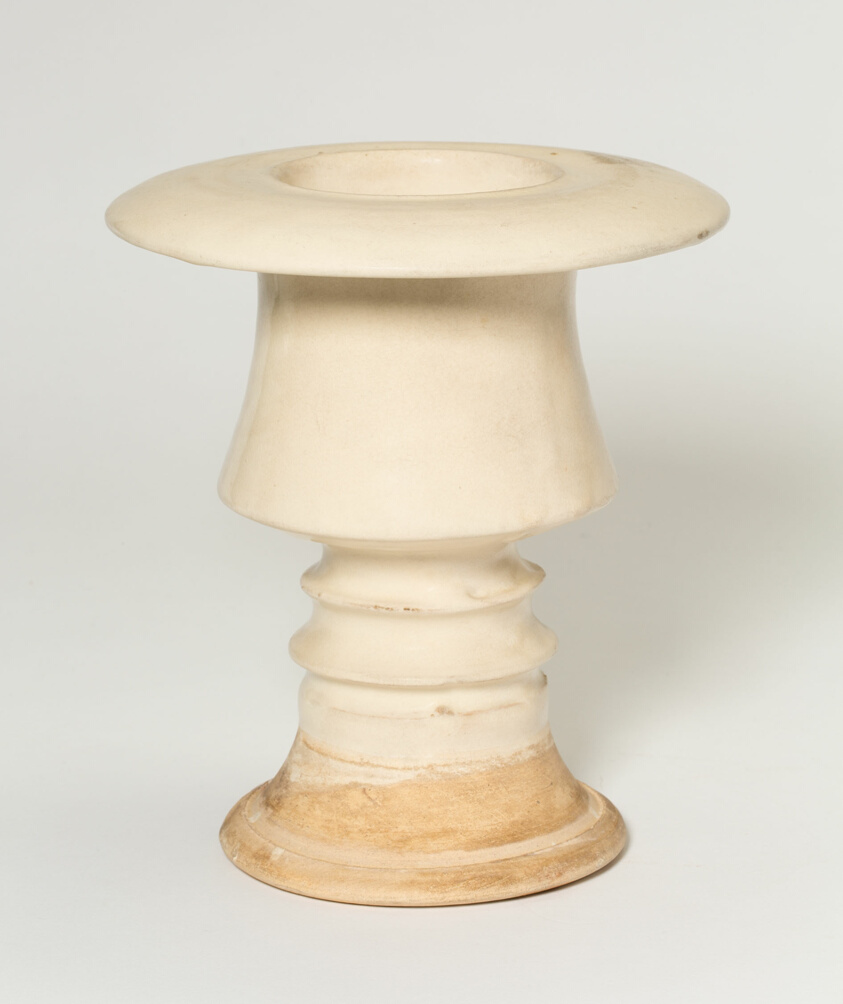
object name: Vessel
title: Incense Burner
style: Chinese (culture or style)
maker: China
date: Northern Song dynasty (960–1127), 11th century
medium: Cizhou ware; slip-coated and glazed stoneware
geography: China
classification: ceramics; asian art; vessel